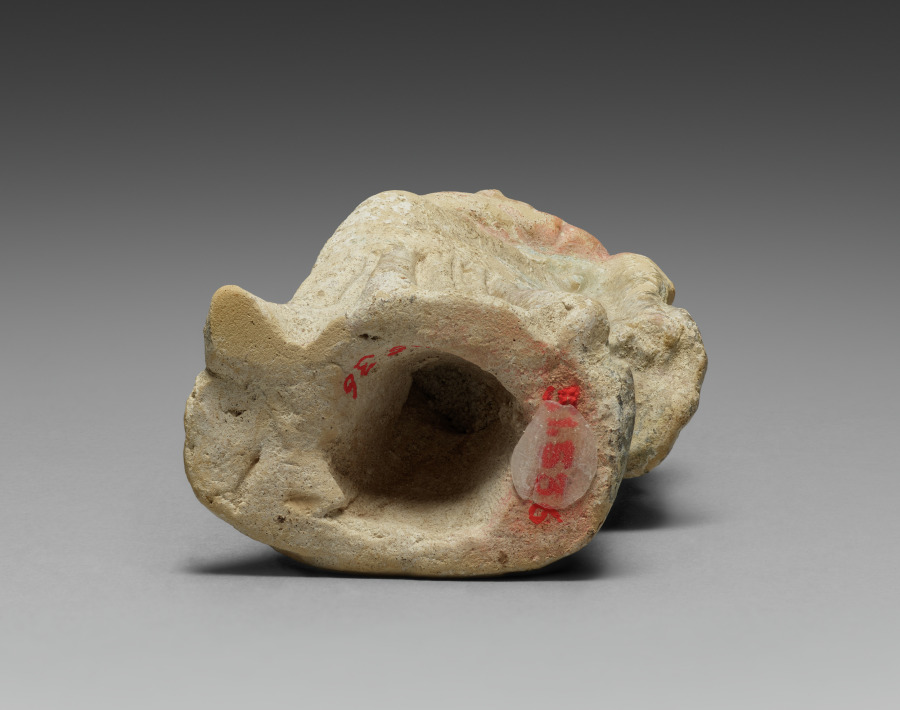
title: Figurine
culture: South Italy, Tarentum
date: 300–100 BCE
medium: terracotta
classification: Sculpture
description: Terracotta figurines like this one were popular throughout the ancient Mediterranean. This statuette takes the shape of a woman wearing a cloak or himation that twists around her form as she pulls it toward her left shoulder. Pigment is preserved in patches of red on the fabric over her arm. The figurine is mold-made, but only the front of the figure is modeled.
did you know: In ancient Greek art and literature, veiling the head or face was often a sign of αίδως (aidos), modesty or shame.